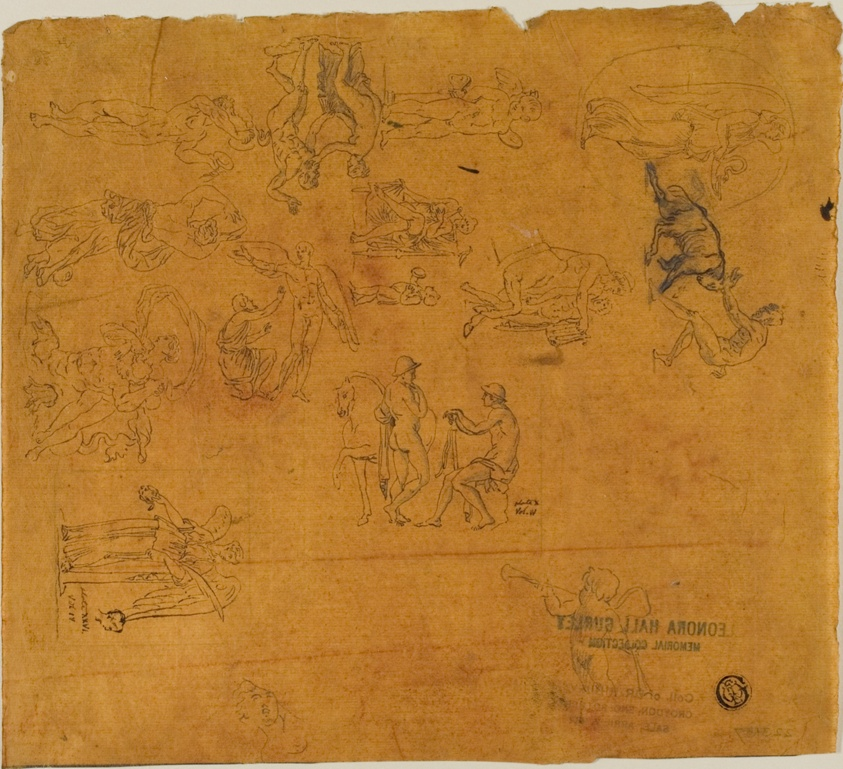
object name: Drawing and Watercolor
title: Sheet of Sketches of Mythological Subjects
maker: Attributed to Thomas Stothard (English, 1755-1834); or possibly George Cumberland (English, 1760-1848)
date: 1700-1799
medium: Pen and brown ink with graphite on tan tinted laid paper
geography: England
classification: pen and ink drawings; drawings (visual works); prints and drawing